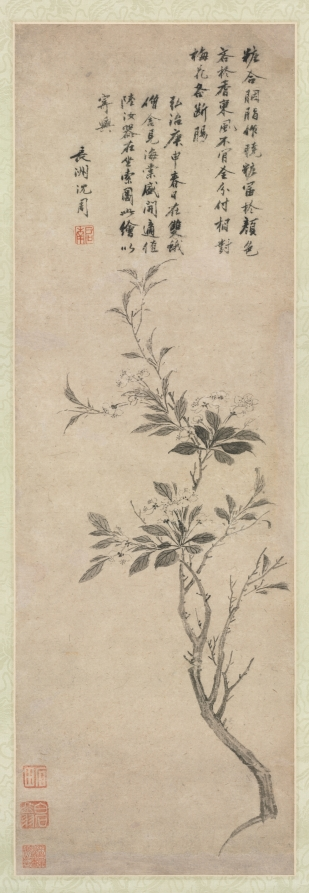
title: Flowering Crab Apple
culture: China, Ming dynasty (1368–1644)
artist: Shen Zhou (Chinese, 1427–1509)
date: 1500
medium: hanging scroll, ink on paper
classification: Painting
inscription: 粧[粉]合胭脂作曉粧，富於顔色吝於香。 東風不肯全分付，相對梅花各斷腸。 弘治庚申春日, 在雙蛾僧舍見海棠盛開, 適值陸汝器在坐索圖, 此繪以寄興。 長洲沈周 [印]啟南; 石田; 白石翁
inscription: 1 additional seal of Wu Yun 吳雲 (1811-1883).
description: Shen Zhou painted a broken branch (zhezhi 折枝) of crab apple, a fragment of nature rather than the full plant in its natural context. Shen uses calligraphic outlines in pure ink to depict the flower petals. The swift yet precise brushstrokes together with the slight S-shaped branch convey vitality. The inscription is a poem written by the artist, commenting on the lovely color and melancholic aura of the crab apple blossom. Shen Zhou is the founder of the Wu School, a group of scholars and officials active around Suzhou in eastern China, known for practicing painting and calligraphy in a refined and elegant style.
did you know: Shen Zhou painted this is an informal and rapidly done presentation picture when he was 74 years old.